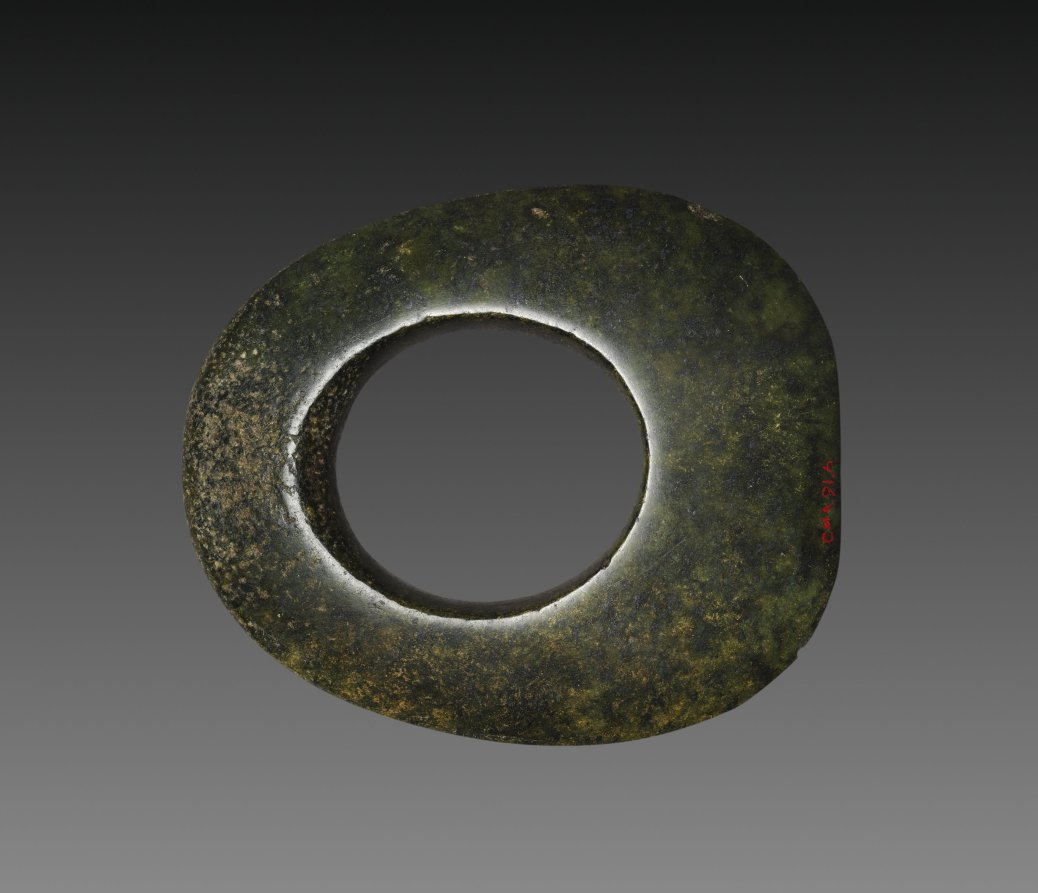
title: Ceremonial Disk-Axe (Yue)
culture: Northeast China, Neolithic period, Hongshan culture (4700–2920 BCE)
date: c. 4700–2920 BCE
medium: serpentine stone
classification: Jade